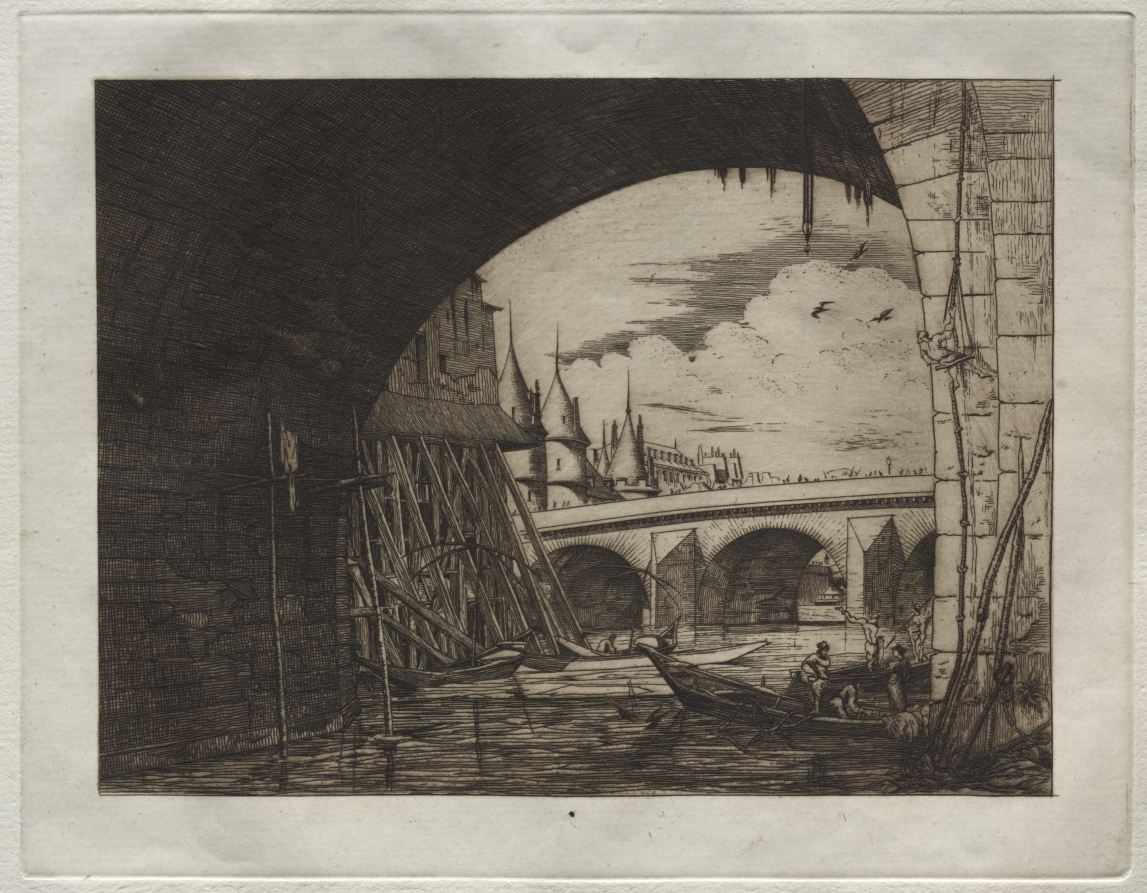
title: L'Arch du Pont Notre Dame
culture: France, 19th century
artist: Edmond Gosselin (French)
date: c. 1881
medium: etching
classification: Print